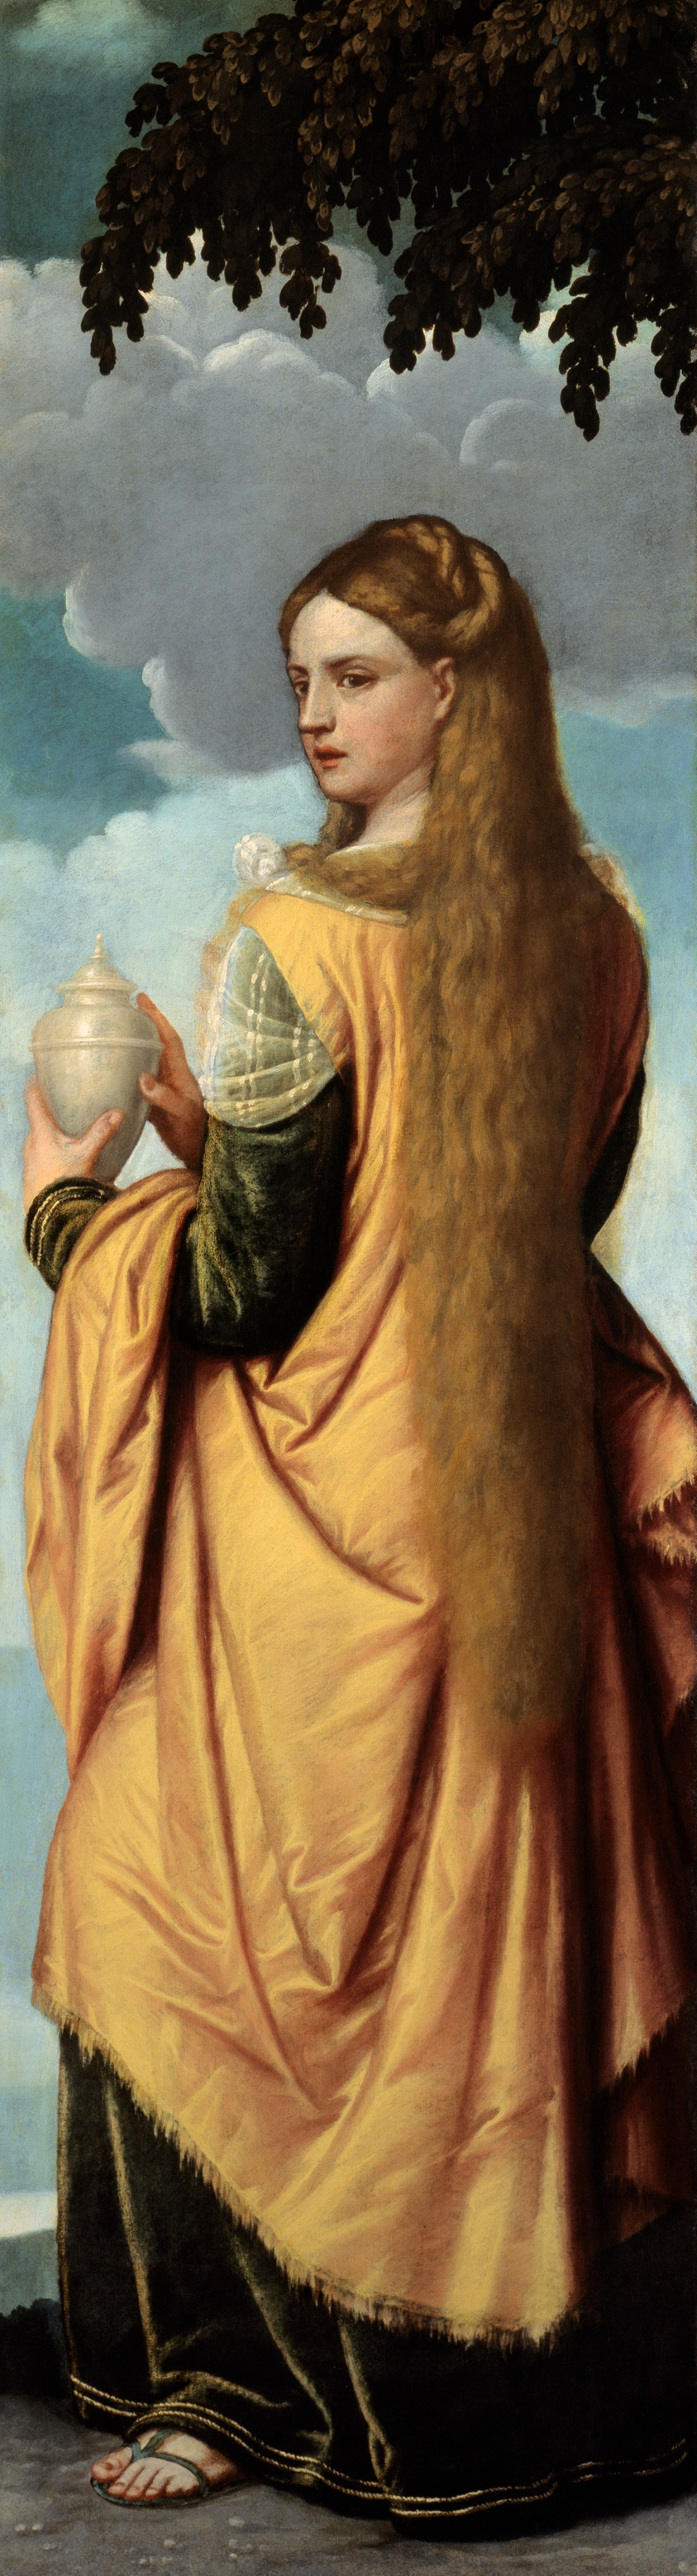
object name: Painting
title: Mary Magdalene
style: sixteenth century, 16th Century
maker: Moretto da Brescia (Alessandro Bonvicino; Italian, c. 1492/95–1554)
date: 1540/50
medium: Oil on canvas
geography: Italy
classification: oil on canvas; Italian; paint; oil paintings (visual works); painting; european painting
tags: Mary Magdalene, yellow (color), woman, trees, tree of life, sky, religious figures, religion, leaves, leaf, foliage, clouds, Christianity, Century of Progress, world's fairs, Chicago World's Fairs